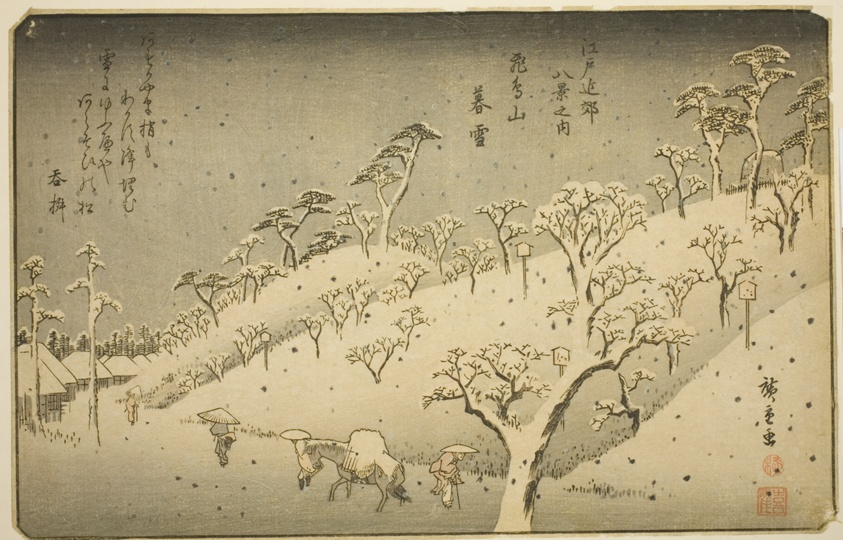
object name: Print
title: Lingering Snow at Asukayama (Asukayama no bosetsu), from the series "Eight Views in the Environs of Edo (Edo kinko hakkei no uchi)"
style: Japanese (culture or style)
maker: Utagawa Hiroshige 歌川 広重; Japanese, 1797–1858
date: c. 1837/38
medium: Color woodblock print; oban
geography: Japan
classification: woodblock print; print; asian art